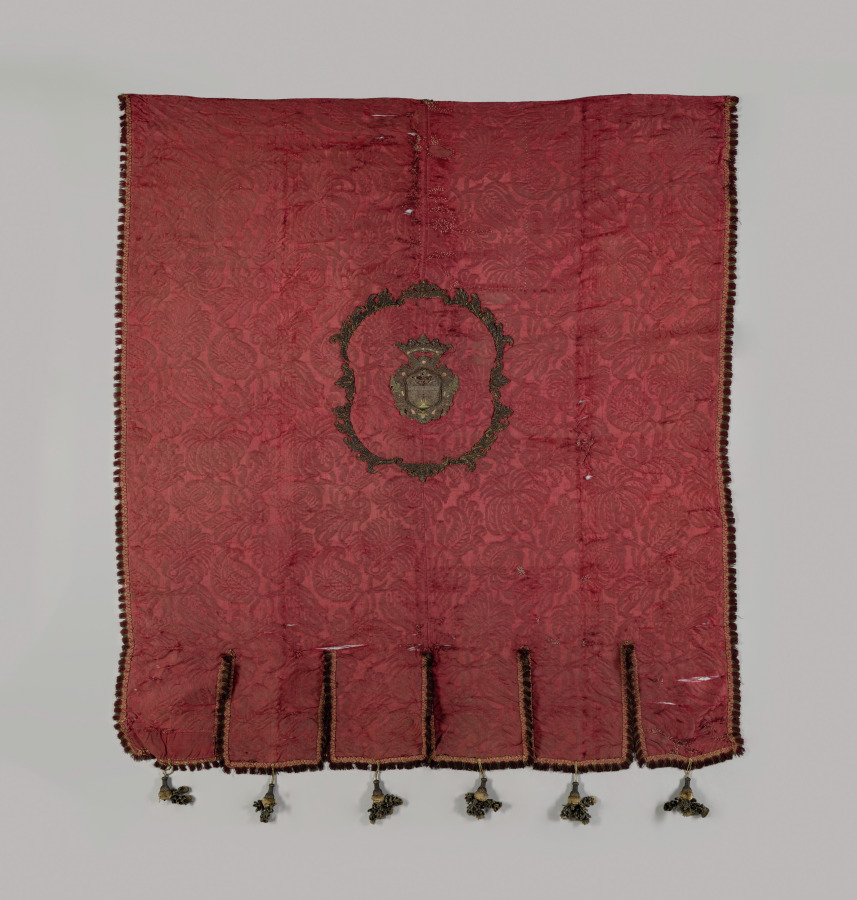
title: Banner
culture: Spain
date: 1700s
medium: crimson silk brocade, with applied embroidery; scalloped border with fringe and tassels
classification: Textile